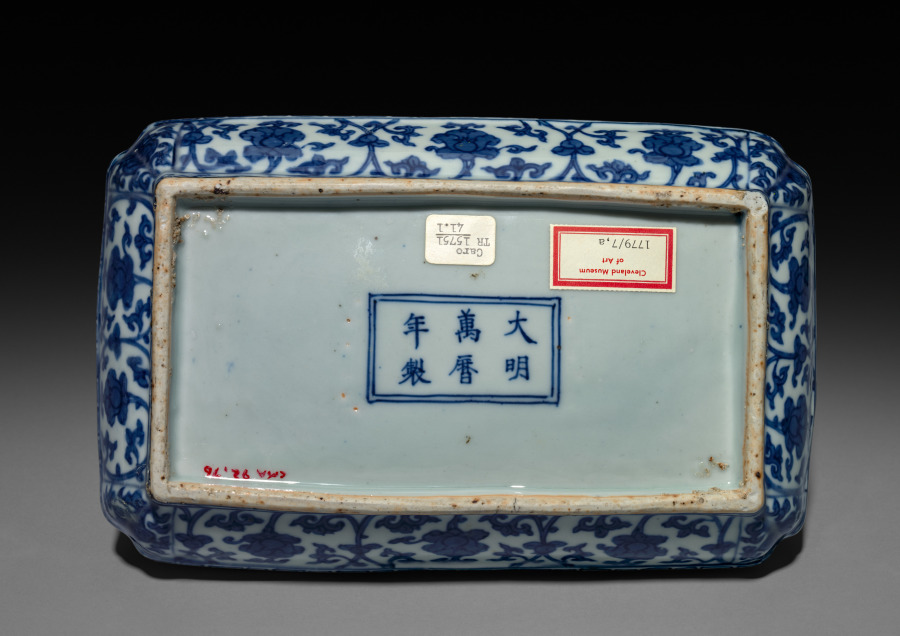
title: Covered Box with Dragons (lid)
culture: China, Jiangxi province, Jingdezhen kilns, Ming dynasty (1368-1644), Wanli reign (1572-1620)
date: 1573–1620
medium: porcelain with underglaze blue decoration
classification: Ceramic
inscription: 大明萬曆年製